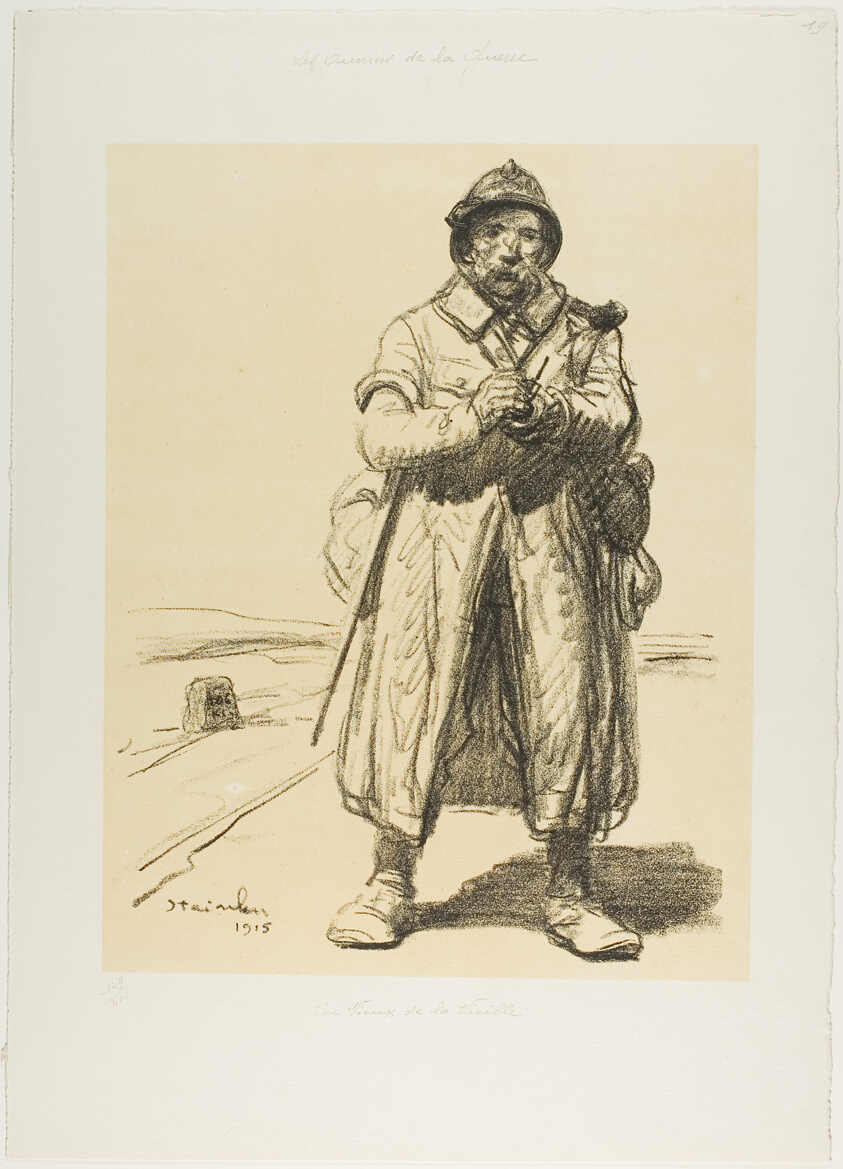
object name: Print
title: A Veteran of the Old Guard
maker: Théophile-Alexandre Steinlen; French, born Switzerland, 1859-1923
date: 1915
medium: Lithograph in black with scraping on stone over a fawn tint on thick off-white wove paper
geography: France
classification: lithograph; print; prints and drawing